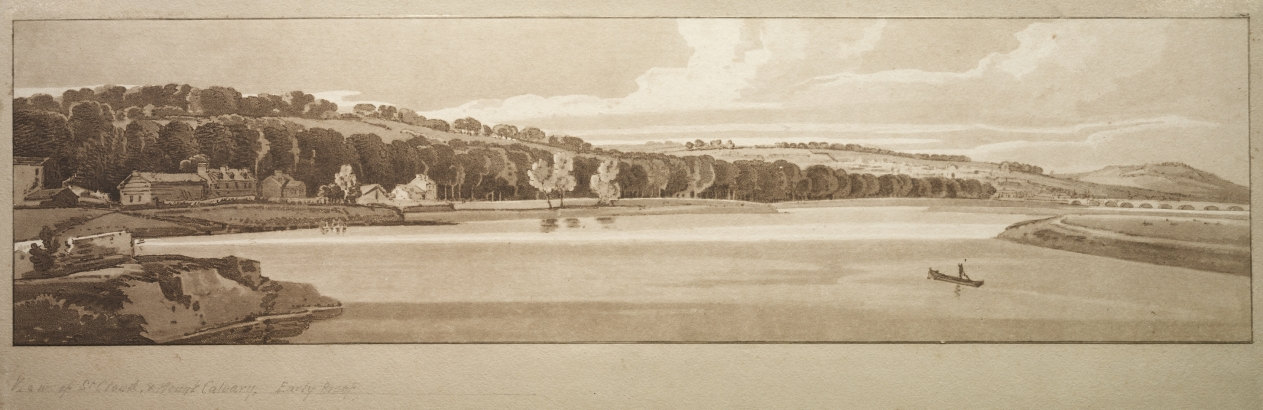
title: A Selection of Twenty of the Most Picturesque Views in Paris: View of St. Cloud and Mount Calvary taken from Pont de Sêve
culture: England, 19th century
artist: Thomas Girtin (British, 1775–1802)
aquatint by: Frederick Christian Lewis (British, 1779–1856)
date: 1802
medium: softground etching and aquatint, printed in brown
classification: Print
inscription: Lower margin, in pencil: View of St. Cloud and Mount Calvary, Early proof